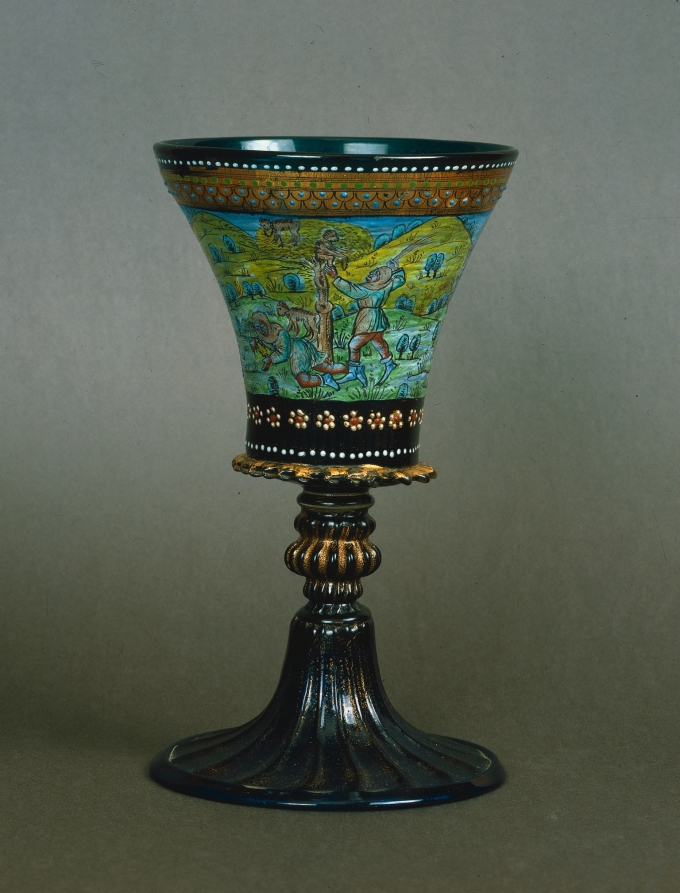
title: The Peddler Goblet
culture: Italy, Venice (Murano), 19th century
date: 1800s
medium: green and blue glass, enameled and gilded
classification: Glass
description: In the decoration of this goblet, the peddler, fast asleep under a tree, is robbed by monkeys. The same subject appears on the famous "Monkey Cup" in The Cloisters of The Metropolitan Museum of Art. It was obviously appealing because peddlers were traditionally believed to have many of the same vices as monkeys. Another part of the decoration includes a scene of Venus emerging from the sea, and the Three Graces.